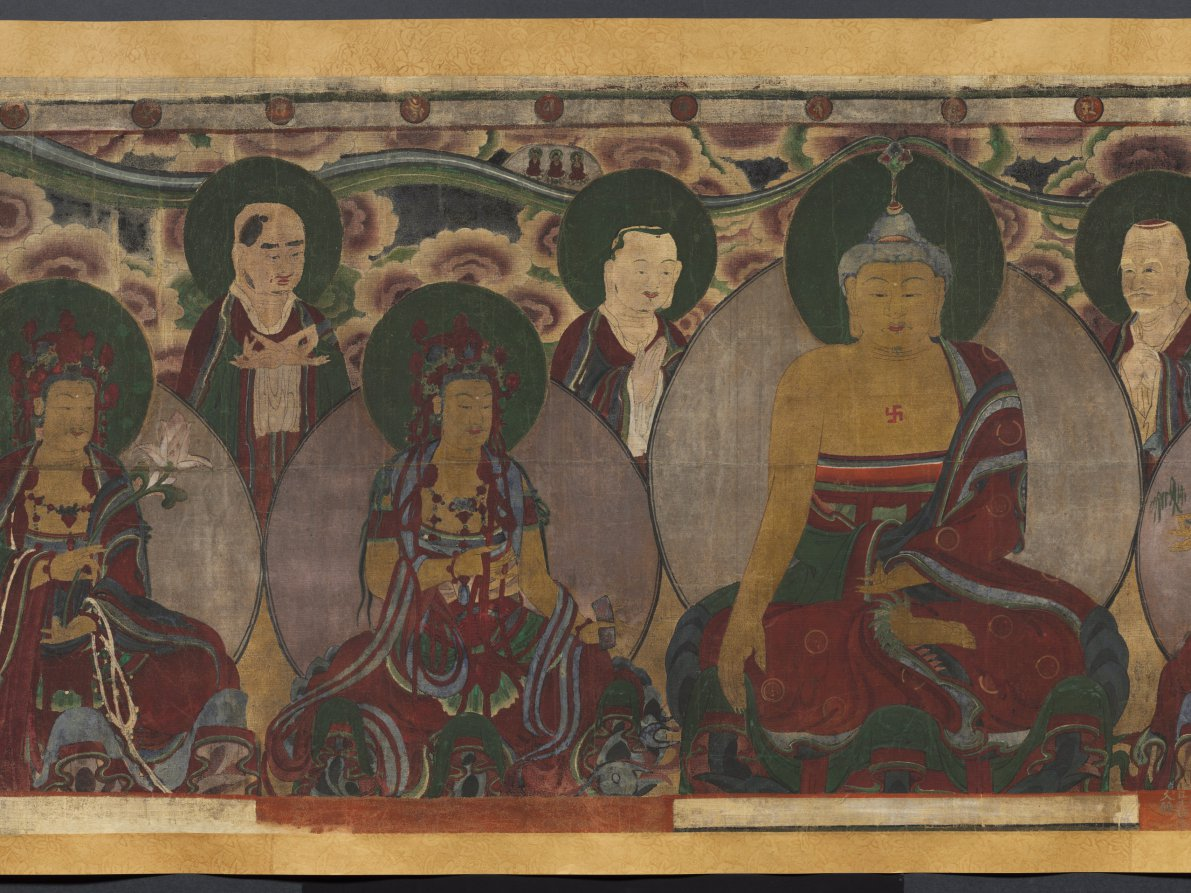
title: Assembly of Buddhist Deities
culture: Korea, Joseon dynasty (1392–1910)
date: 1846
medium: handscroll; ink and color on silk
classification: Painting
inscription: Inscription dated 1846.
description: The central deity in this Buddhist painting is Sākyamuni Buddha, given that he is displaying the earth-touching hand gesture. He is surrounded by several bodhisattvas and disciples. The inscription below, even though partly erased, tells us that the painting was created in 1846 and was hung in the monks’ residential hall.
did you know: The inscription below, even though partly erased, tells us that the painting was hung in the monks’ residential hall.